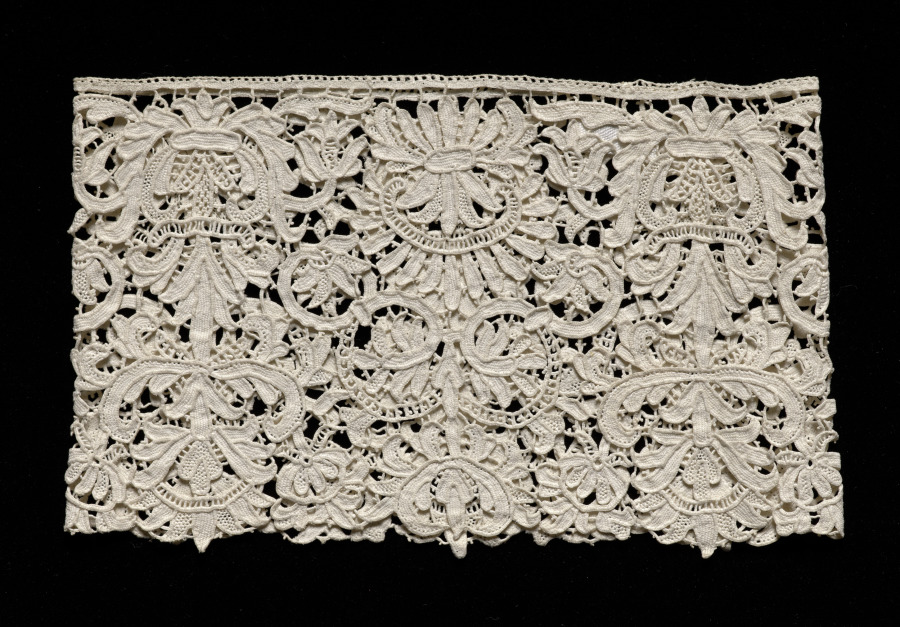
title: Lace Cuff (one of a pair)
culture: Italy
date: 1600–1640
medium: Needle lace (punto in aria)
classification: Lace